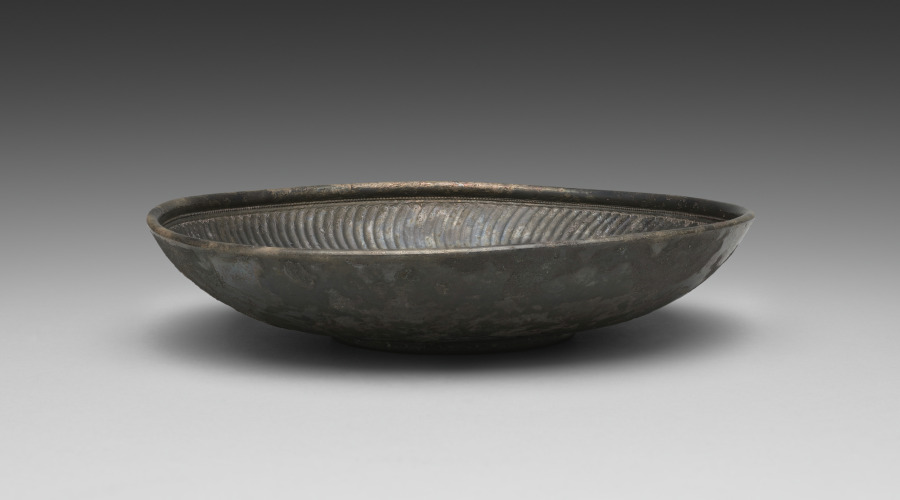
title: Bowl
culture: Roman, Imperial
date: c. 100–300 CE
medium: silver: cast and carved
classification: Metalwork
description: This large cast silver bowl features wavy fluting (sometimes called strigilation) across much of the interior, terminating in a sort of scalloped edge and finely beaded border beneath the rim. Within the central medallion are a miniature oblong shell-like object and the punched inscription VERISS (perhaps a name), both slightly off-center. The combination of wavy fluting, scalloped edges, and a shell-like object may allude to the sea, or to the liquid contents this bowl may once have contained.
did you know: This solid silver bowl weighs nearly one kilogram, more than two pounds.